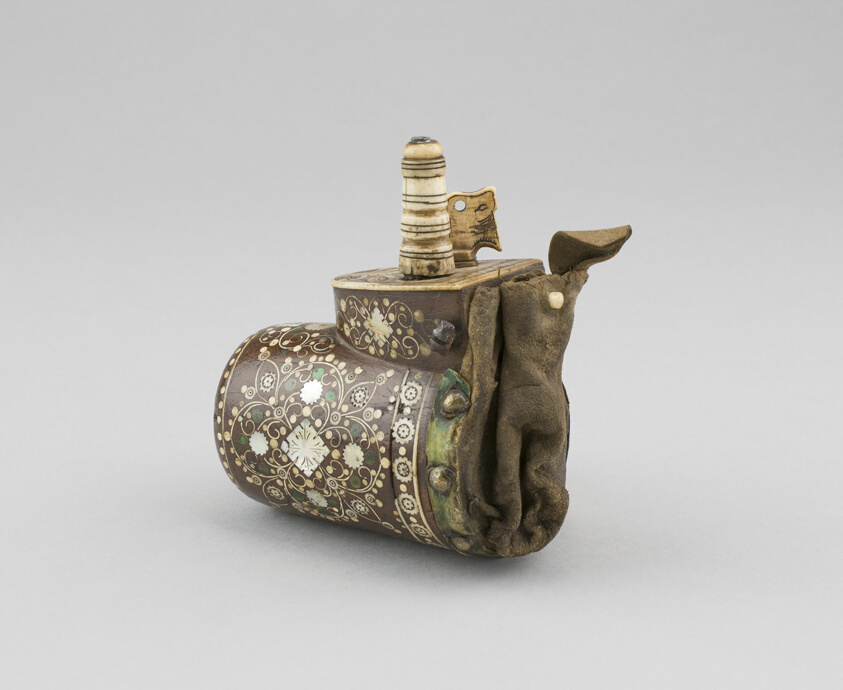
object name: Arms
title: Powder Flask with Bullet Pouch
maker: Polish, Silesia, Teschen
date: mid–17th century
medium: Wood, horn, mother-of-pearl, leather, brass, and iron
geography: Central Europe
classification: firearm-accessory; arms; arms and armor